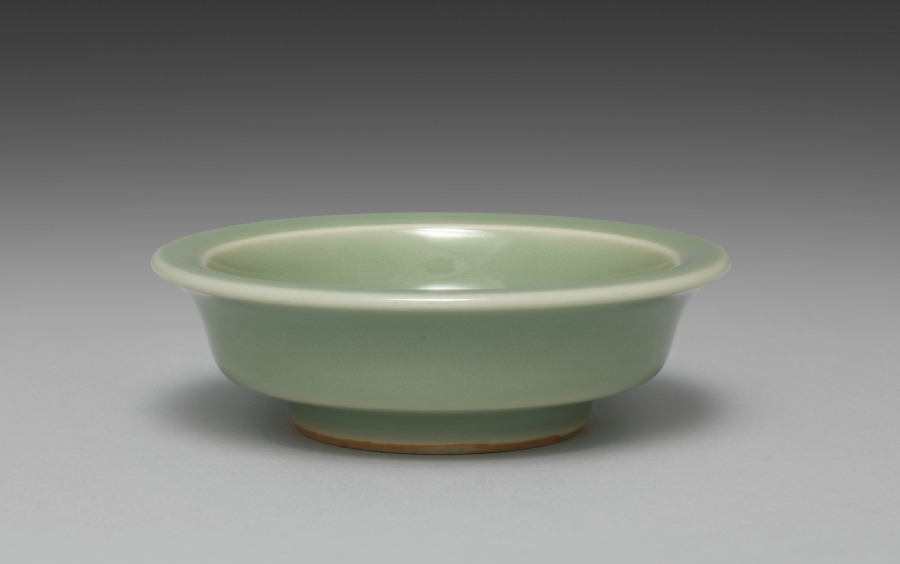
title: Saucer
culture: Japan, Meiji period (1868–1912)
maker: Seifū Yohei III (Japanese, 1851–1914)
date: 1893–1914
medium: One from a set of ten dishes; porcelain with green glaze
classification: Ceramic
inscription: 清風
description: Yohei III’s main output for his sophisticated clientele was in the form of tea sets and dining sets. He created a range of dishes in green glazes. He often produced in pairs, sets of five, or sets of ten. For this set of ten small dishes in a simple, round form that emphasizes the glaze above all, the box lid designates the piece as seiji, or green-glazed porcelain, using a general term for the extensive palette of green glazes often called celadon in English. The box lid further identifies the dishes themselves as tōchō, literally “bean-sized saucers,” a size that makes them suitable for dipping sauces.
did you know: The ten dishes in this set are stored in stacks of five in a two-compartment box.